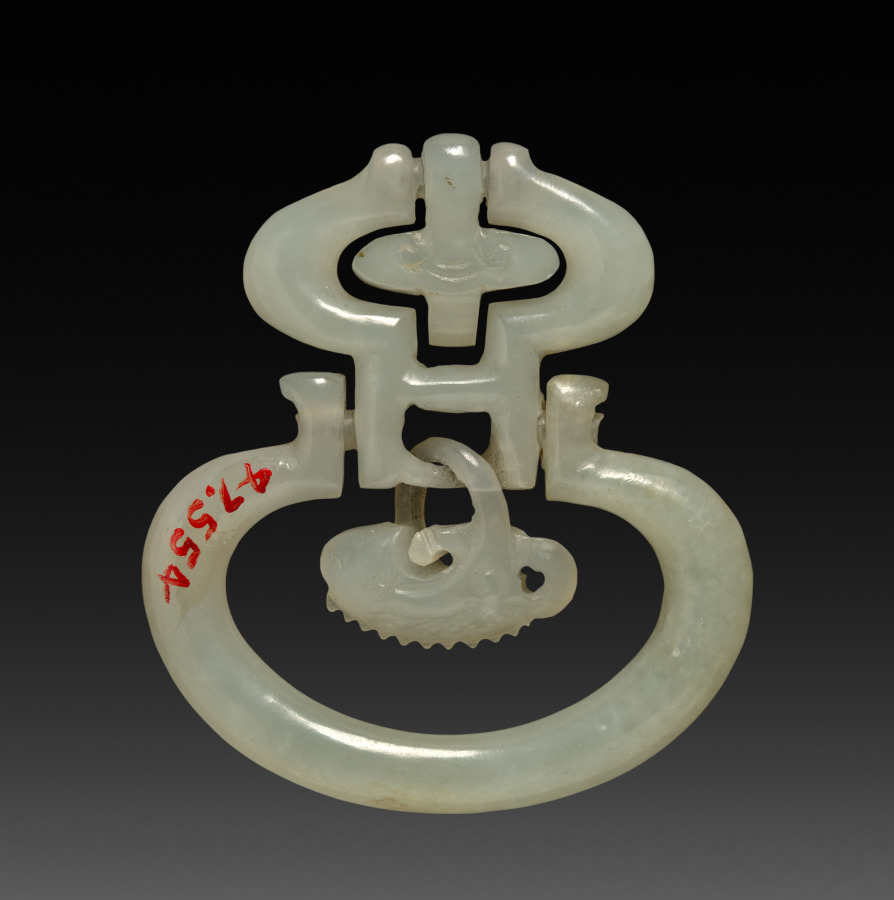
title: Part of a Buckle or Ornament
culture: China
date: 1800s–1900s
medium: white jade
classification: Jewelry